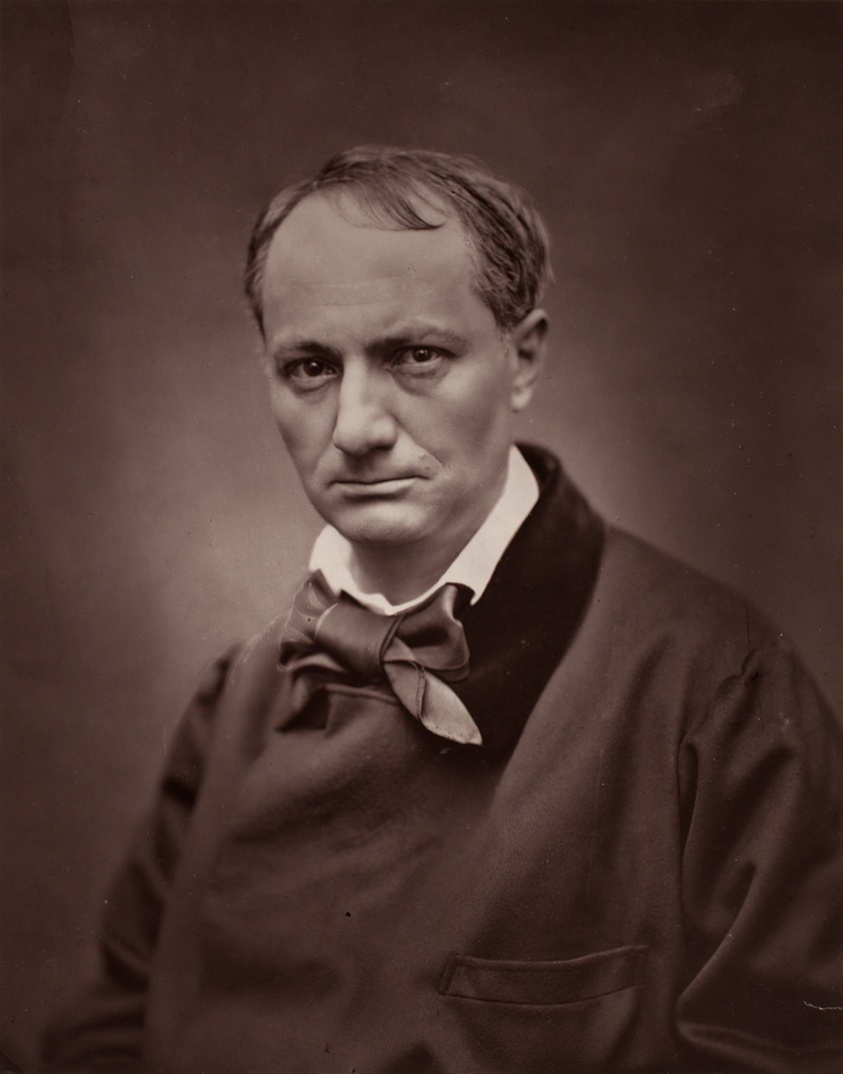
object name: Photograph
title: Charles Baudelaire (French poet, critic, and writer, 1821-1867)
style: 19th century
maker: Etienne Carjat (French 1828–1906)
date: c. 1863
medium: Woodburytype, from the periodical “Galerie Contemporaine Littéraire, Artistique” (1878), volume 5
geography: France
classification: woodburytype; photomechanical process; photography; photograph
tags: Collected by Hugh Edwards, Paris, Contemporaine Littéraire